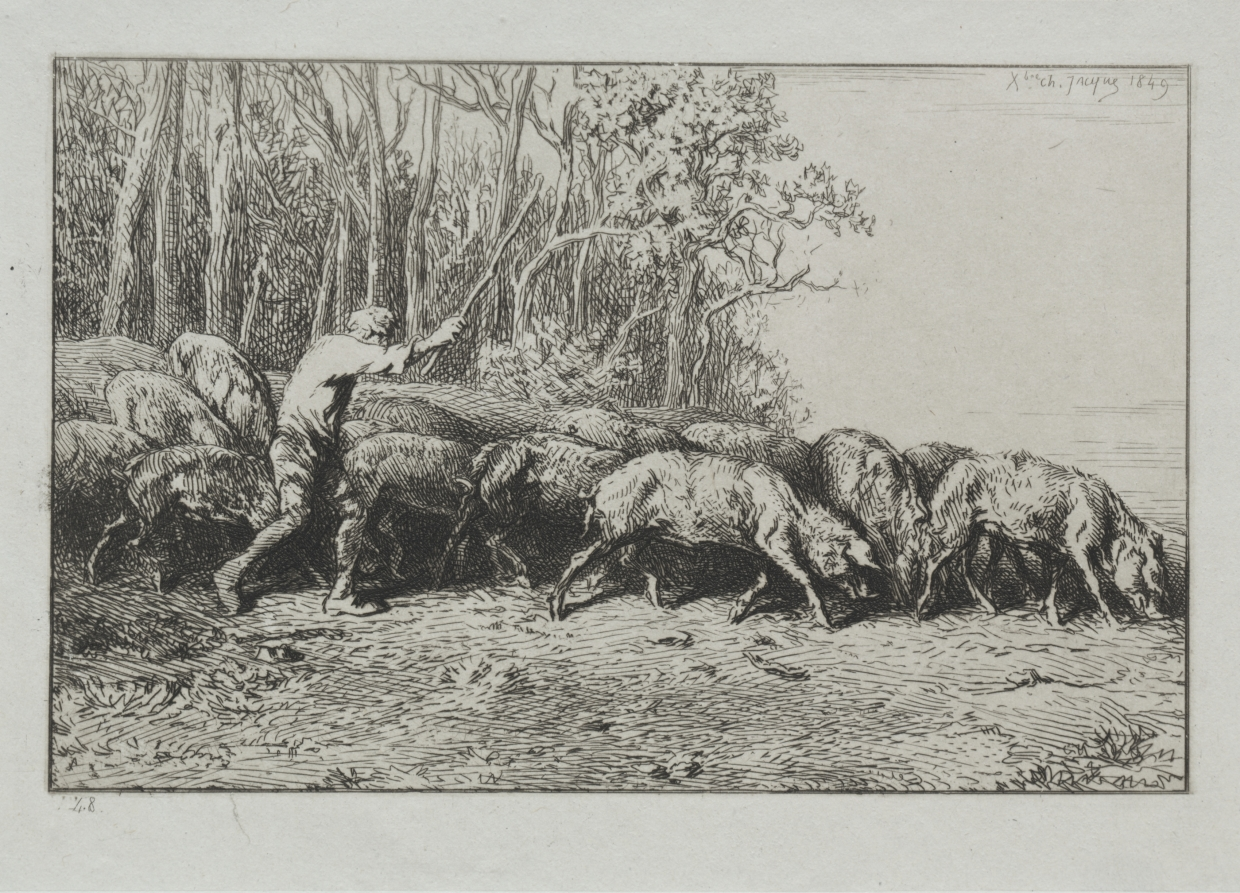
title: Herd of Pigs Leaving a Forest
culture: France, 19th century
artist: Charles-Émile Jacque (French, 1813–1894)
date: 1849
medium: etching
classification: Print